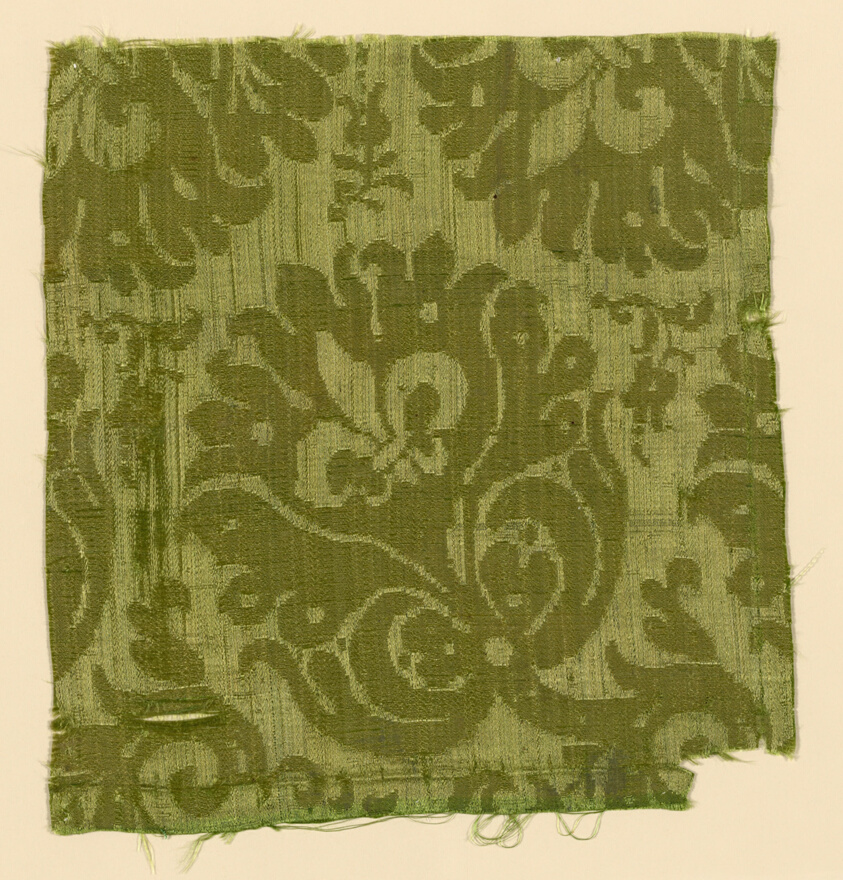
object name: Textile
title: Fragment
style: louis xiii, european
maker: France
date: Louis XIII period (1610–1643), early 17th century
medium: silk, simple satin damask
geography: France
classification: textile; weaving